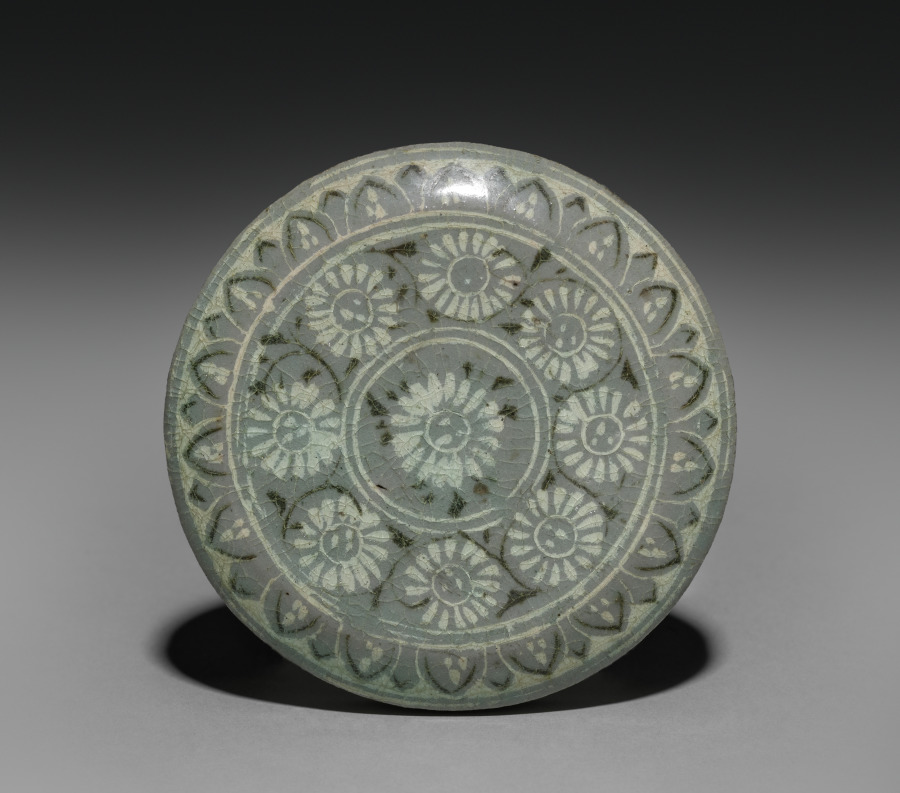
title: Box (lid)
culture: Korea, Goryeo dynasty (918–1392)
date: 918–1392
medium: earthenware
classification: Ceramic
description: Celadons, spoons, seals, and bronze mirrors were the most common burial objects in tombs during the Goryeo period (918–1392). Once used to contain colored powder, rouge, and eyebrow gel for makeup, this small container was one of the standard goods that furnished elites' tombs. Both women and men used the grain powder of rice or millet for whitening their skin, safflower extract for rouge, and plant ash or soot for eyebrow gel. Yet, natural-looking makeup seems to have been the most favorable one in Korea according to the travelogue by Xu Jing (1091–1153), the Chinese diplomat who visited Korea in 1123.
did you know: This lidded ceramic container was used to store either incense or cosmetics.